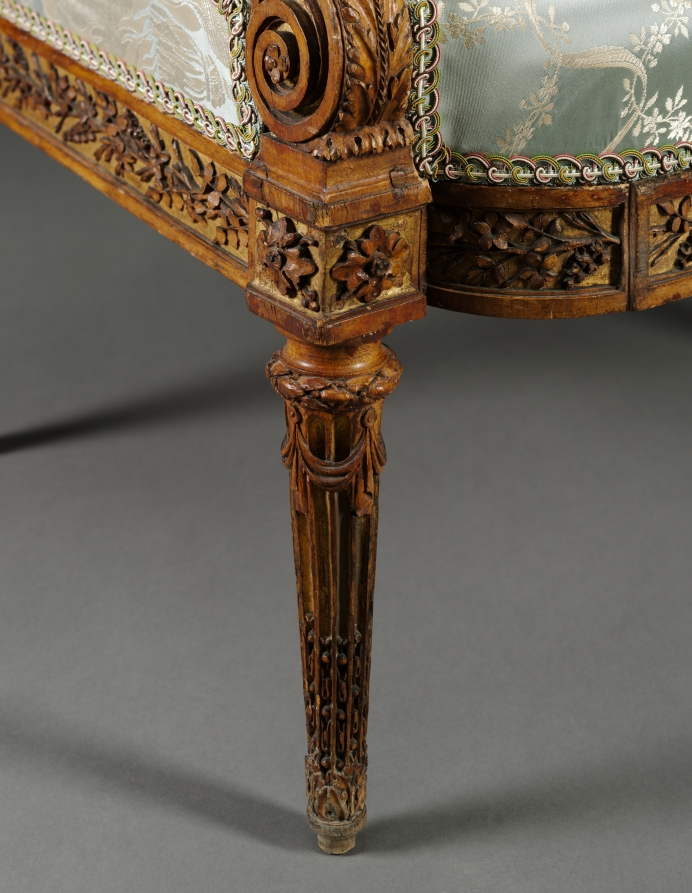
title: Armchair (Fauteuil) (2 of 2)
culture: France, 18th century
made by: Nicolas-Denis Delaisement (French)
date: c. 1785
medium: boxwood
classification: Furniture and woodwork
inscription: signed on front and back of frame of seat underneath: Delaisement with inverted "s."